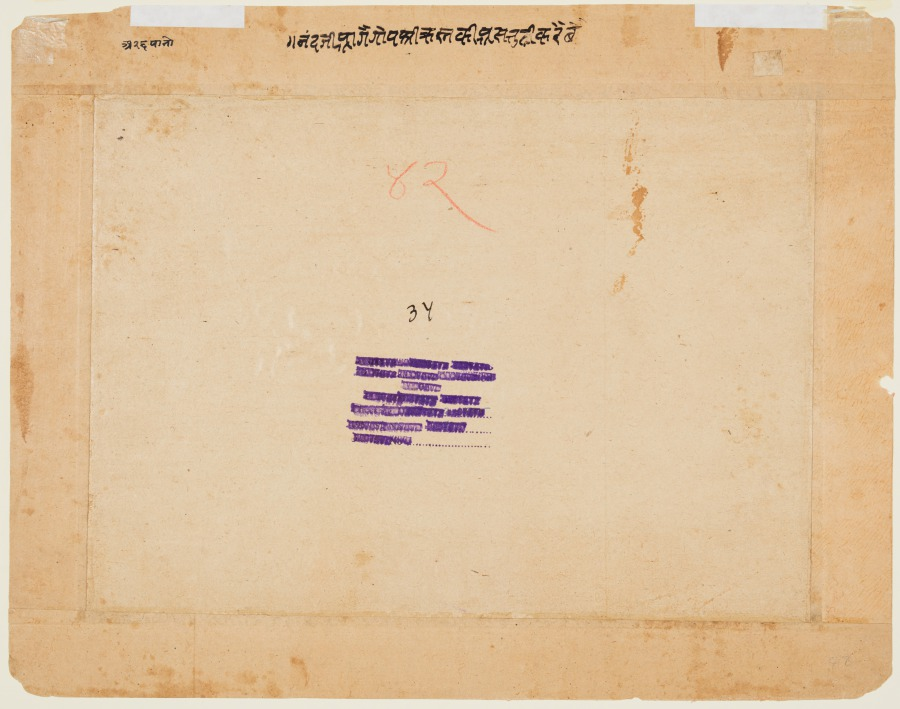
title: Nanda and the Elders in Council with the Cowherds, from a Bhagavata Purana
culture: Northwestern India, Rajasthan, Rajput Kingdom of Bikaner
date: c. 1690–1700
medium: Gum tempera, silver, and gold on paper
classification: Painting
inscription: a[dhyāye] 26 pāno. naṃda ji āgai gopa śrī kasna kī asatudī karai bai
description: The glowing hues and exquisite treatment of the figures and vegetation transport the viewer to the mythic realm of the Hindu god Krishna. Nanda, the lead elder of the cowherder village, sits amid the village council, larger than the others. After witnessing the divine and superhuman activities of Krishna, the cowherders approached Nanda and asked him for an explanation.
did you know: Each of the cowherd boys wears a different color hood.